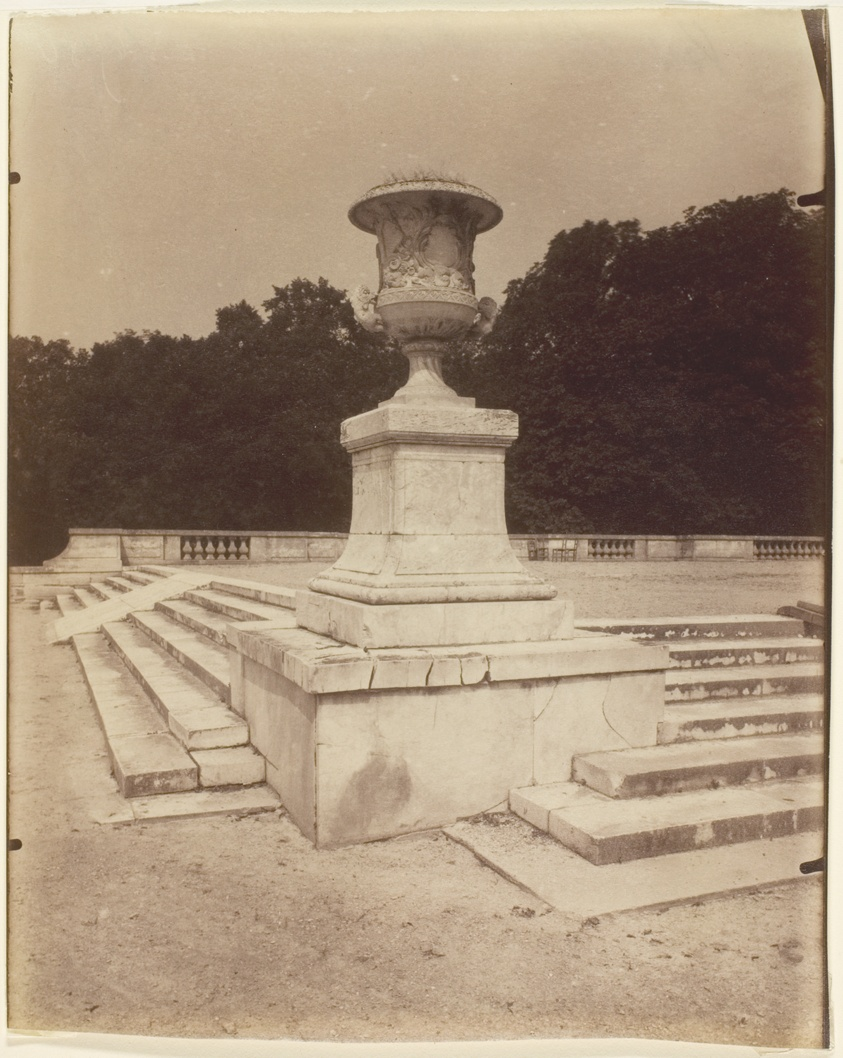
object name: Photograph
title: Versailles, Le Parc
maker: Jean-Eugène-Auguste Atget (French, 1857–1927)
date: 1905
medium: Albumen print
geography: France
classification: albumen silver print; photographic process; photography; photograph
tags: Collected by Hugh Edwards